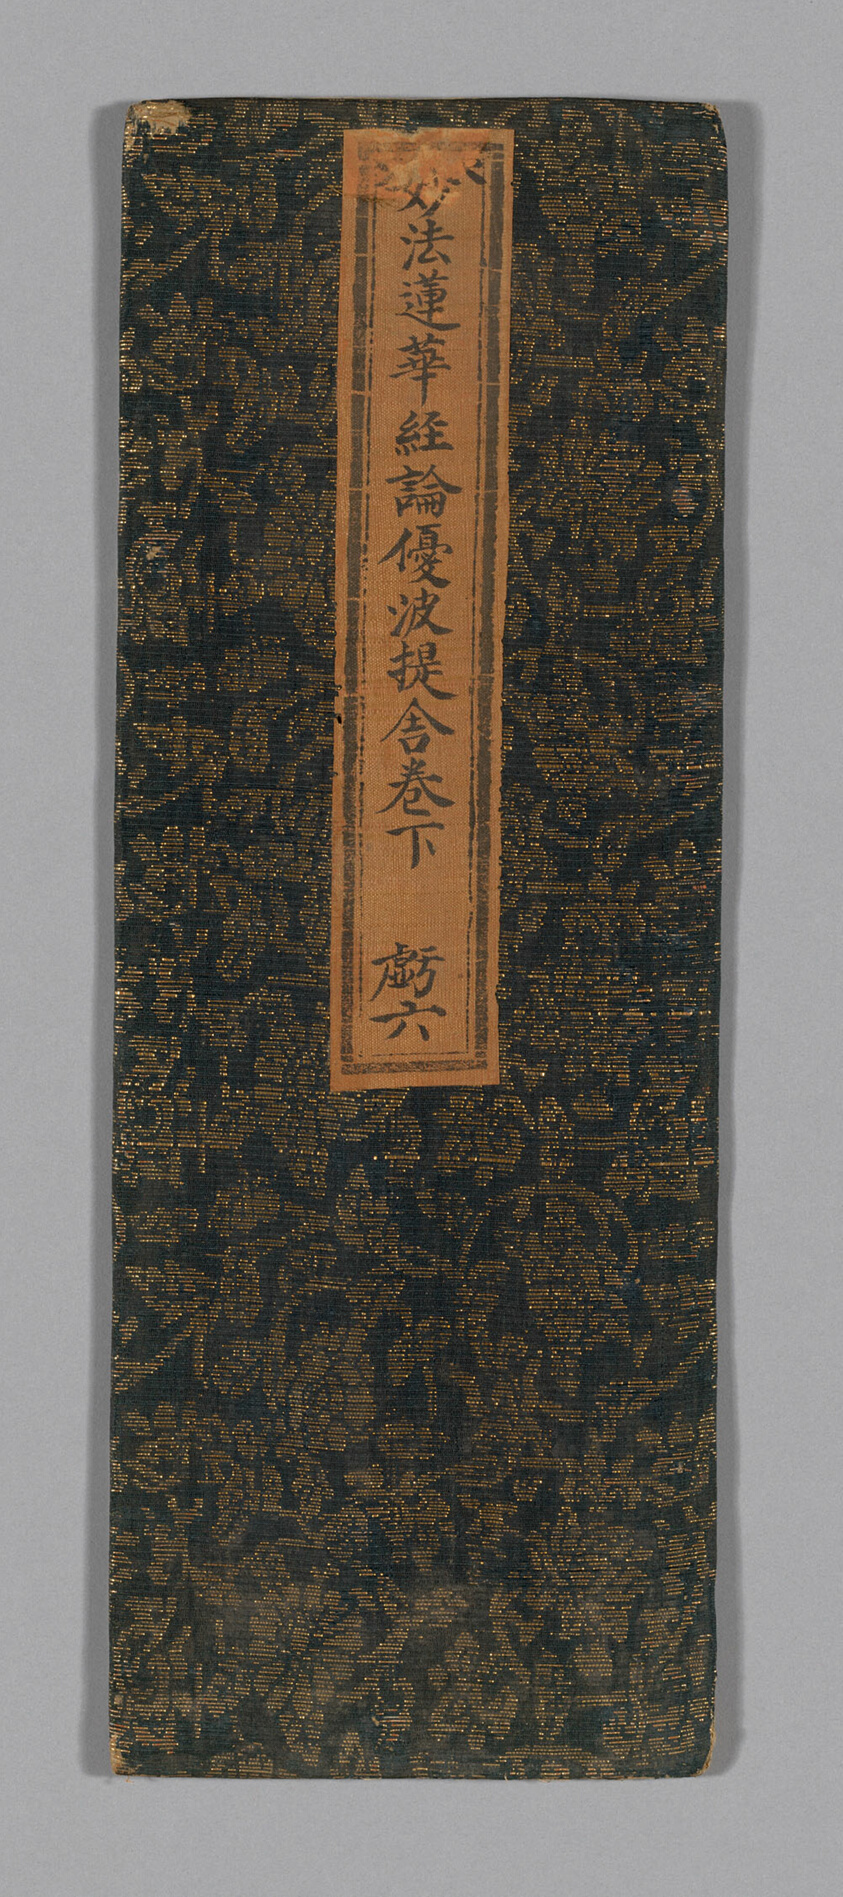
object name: Textile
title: Sutra Cover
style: ming, Chinese (culture or style), East Asian, asian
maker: China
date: Ming dynasty (1368–1644), c. 1590's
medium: Silk and gold-leaf-over-lacquered-paper strips, gauze weave with supplementary patterning wefts; label: silk, plain weave; painted with ink; glued to paper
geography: China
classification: textile; weaving